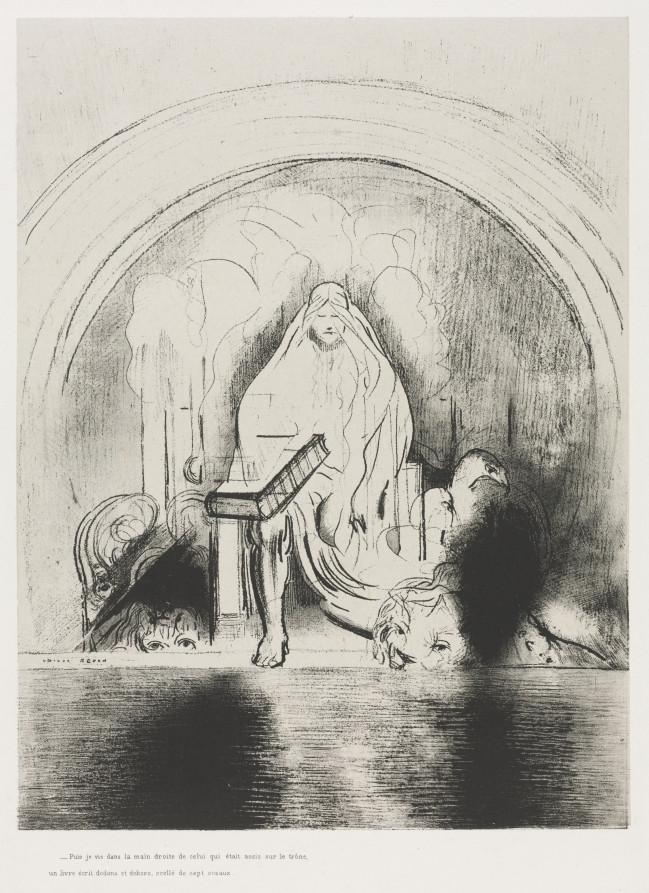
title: And I Saw in the Right Hand of Him that Sat on the Throne a Book Written within and on the Backside, Sealed with Seven Seals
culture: France, late 19th Century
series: The Apocalypse of Saint John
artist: Odilon Redon (French, 1840–1916)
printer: Blanchard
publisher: Ambroise Vollard (French, 1867–1939)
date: 1899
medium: lithograph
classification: Print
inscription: signed on stone at lower left: ODILON REDON; printed at lower left, below image: Puis je vis, dans la main droite de celui qui était assis sur le trône, / un livre écrit dedans et dehors, scellé de sept sceaux.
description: The last of Odilon Redon’s 11 lithographic portfolios, this series relates to the Book of Revelation from the Christian Bible. The subject had been explored throughout art history, allowing the artist to align himself with past masters, such as Albrecht Dürer. Although Redon often vaguely referenced texts, these prints directly illustrate 12 individual passages, including one about a woman clothed with the sun and another focused on a great star falling from heaven. By the time he created this portfolio, Redon’s reputation was well established. The project was published by art dealer Ambroise Vollard, who began to sell and promote Redon’s work about a year earlier, building a market for his prints in Paris and abroad.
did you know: This is one of the last works where Redon experimented with lithograph and all-black medium. In contrast, bright, dazzling colors characterize his late works.